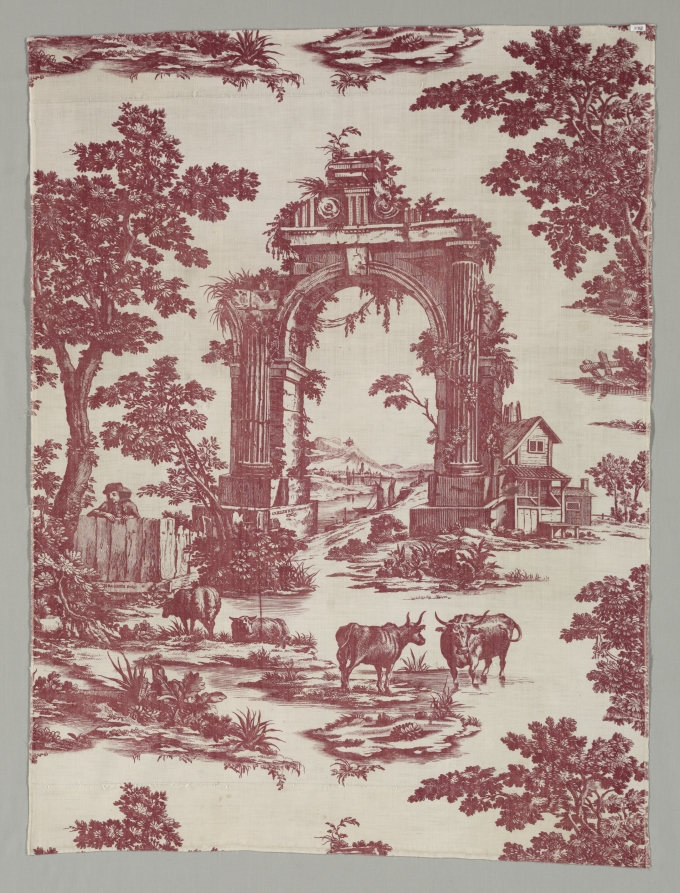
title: Copperplate Printed Cotton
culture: England, 18th century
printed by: firm of John Collins (British)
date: 1765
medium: copperplate printed cotton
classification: Textile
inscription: inscribed on the arch: "COLLINS Woolmers 1765" and "H. ROBERT sculp."